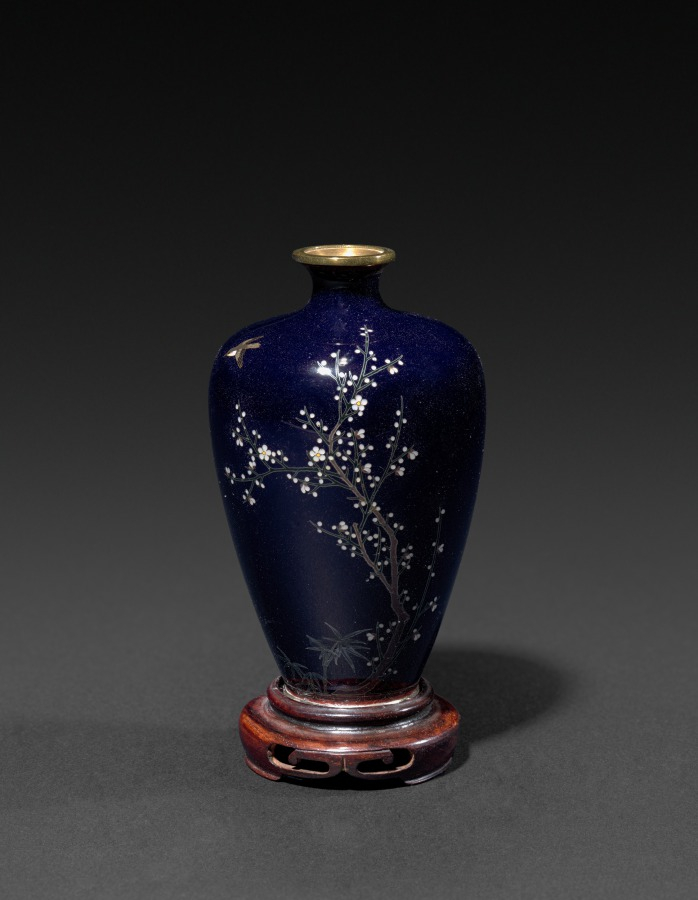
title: Vase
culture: Japan, Meiji period (1868–1912) to Taishō period (1912–26)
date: early 1900s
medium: One of a pair; cloisonne with carved wood base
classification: Enamel